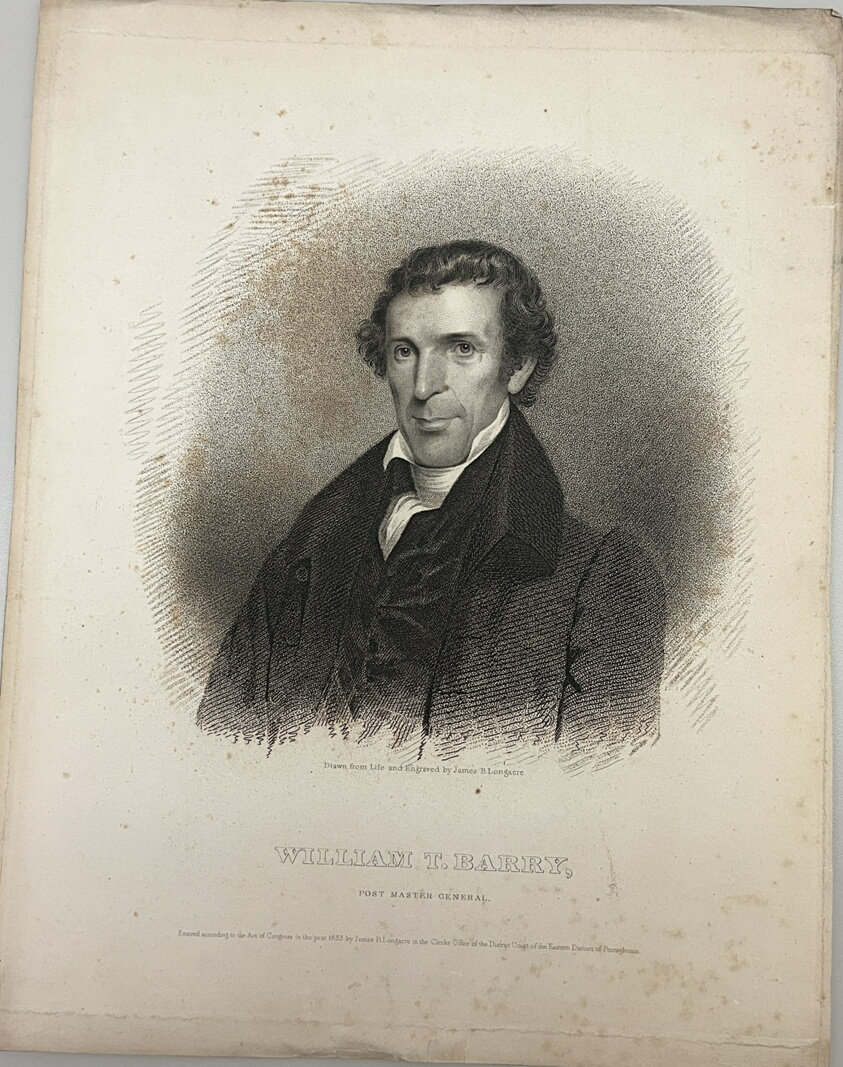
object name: Print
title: William T. Barry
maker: James Barton Longacre (American, 1794-1869)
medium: Steel engraving on paper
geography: United States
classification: reproduction; print; prints and drawing